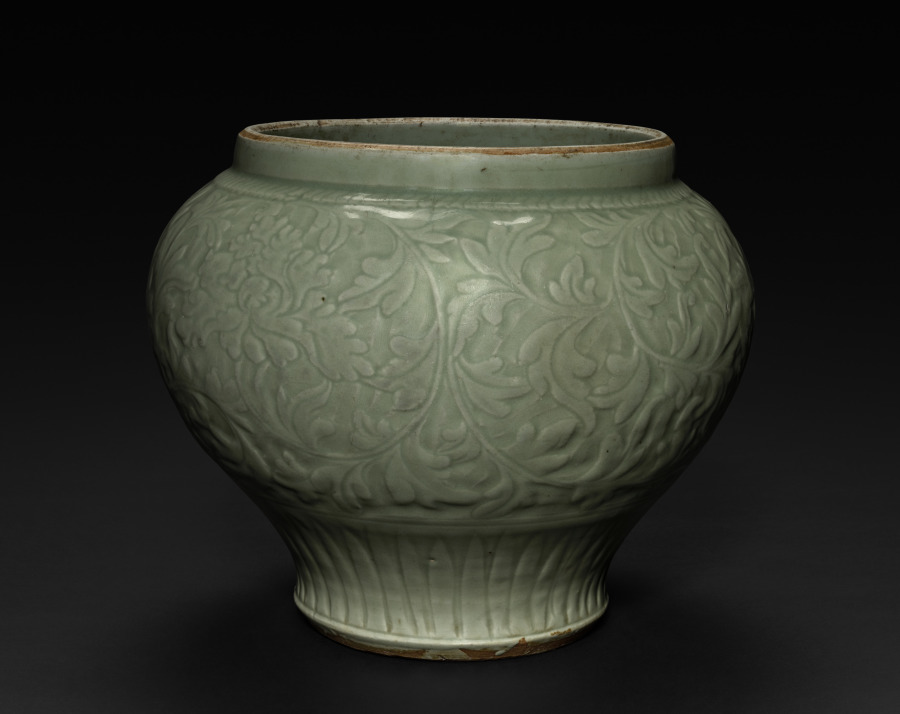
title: Jar: Celadon Ware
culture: China, Ming dynasty (1368–1644)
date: 1368–1644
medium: stoneware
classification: Ceramic